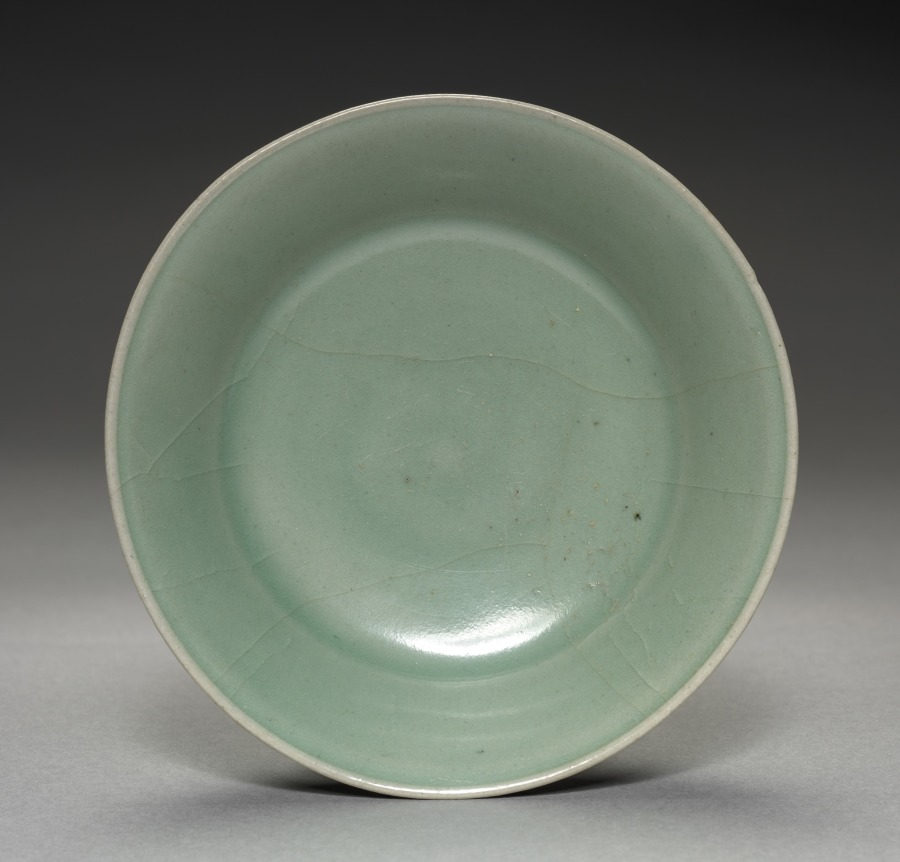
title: Dish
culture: Korea, Goryeo dynasty (918–1392)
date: 1100s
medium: glazed porcelain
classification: Ceramic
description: Celadon wares used for everyday such as this dish were among the most common burial objects in tombs during the Goryeo period (918–1392). Furnishing tombs with an elaborate assemblage of objects was believed to honor and comfort the newly dead. Generally, Goryeo tombs were left untouched until the late 1800s. During the colonial period (1910–45), however, Japanese archaeologists competitively excavated the tombs located in Kaeseong, the former capital of the Goryeo period, and soon became available for Japanese and Western collectors.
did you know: The pale bluish glaze indicates that this dish was created in the 1100s, when the production of celadon reached its technical peak.